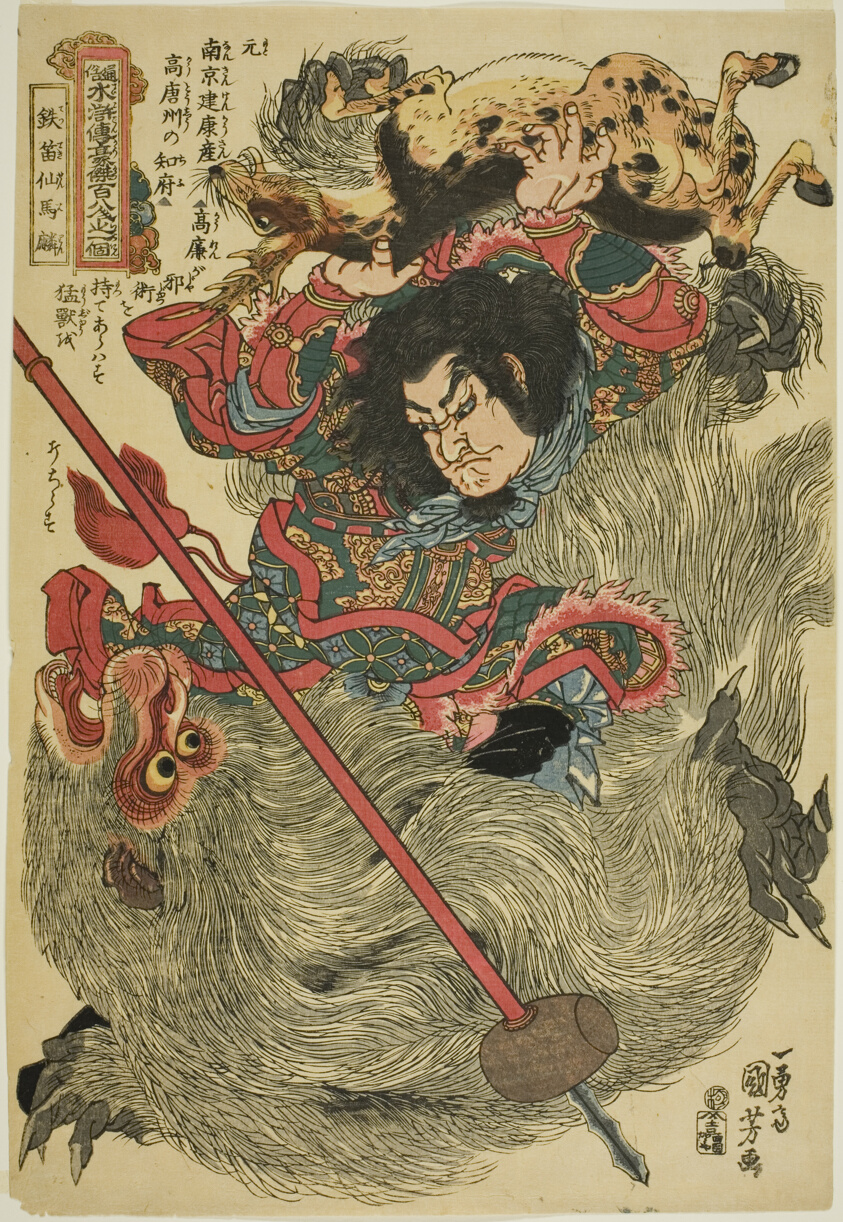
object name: Print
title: Ma Lin (Tettekisen Barin), from the series "One Hundred and Eight Heroes of the Popular Water Margin (Tsuzoku Suikoden goketsu hyakuhachinin no hitori)"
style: Japanese (culture or style)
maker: Utagawa Kuniyoshi (Japanese, 1797-1861)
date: c. 1827/30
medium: Color woodblock print; oban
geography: Japan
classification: woodblock print; print; asian art